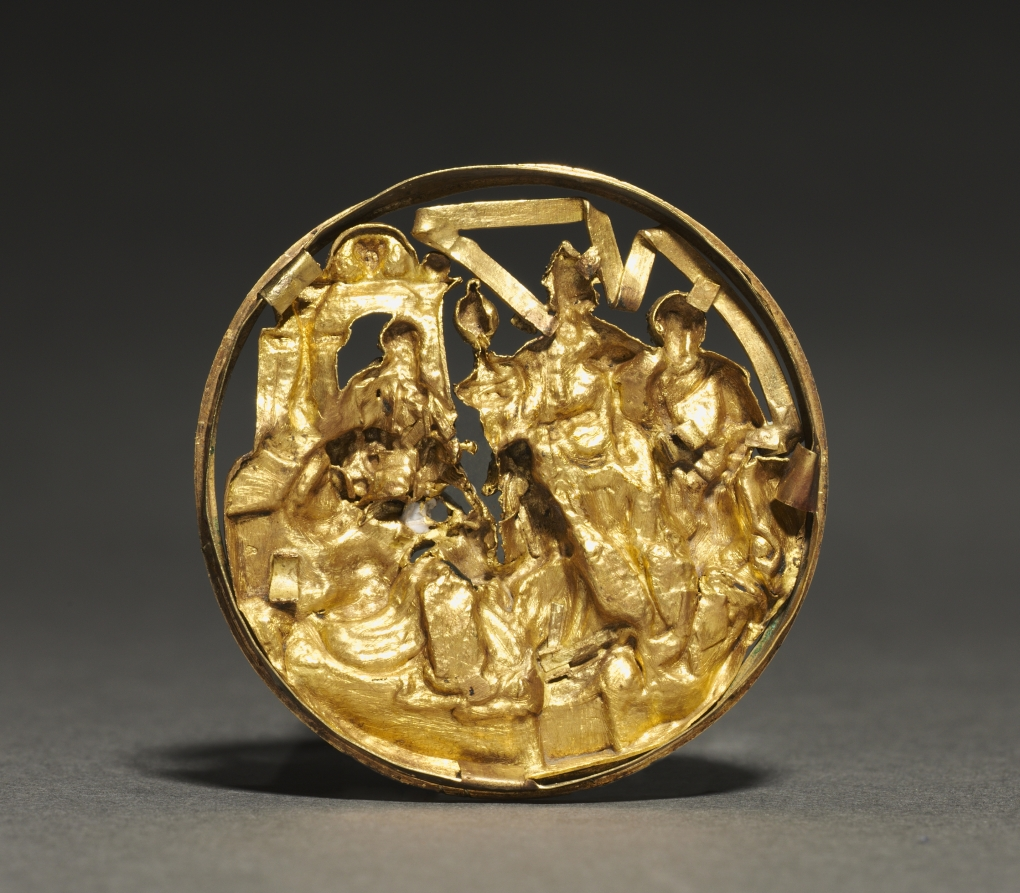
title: Hat Jewel Depicting the Adoration of the Magi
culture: France, 16th century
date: c. 1540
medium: enameled gold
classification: Jewelry